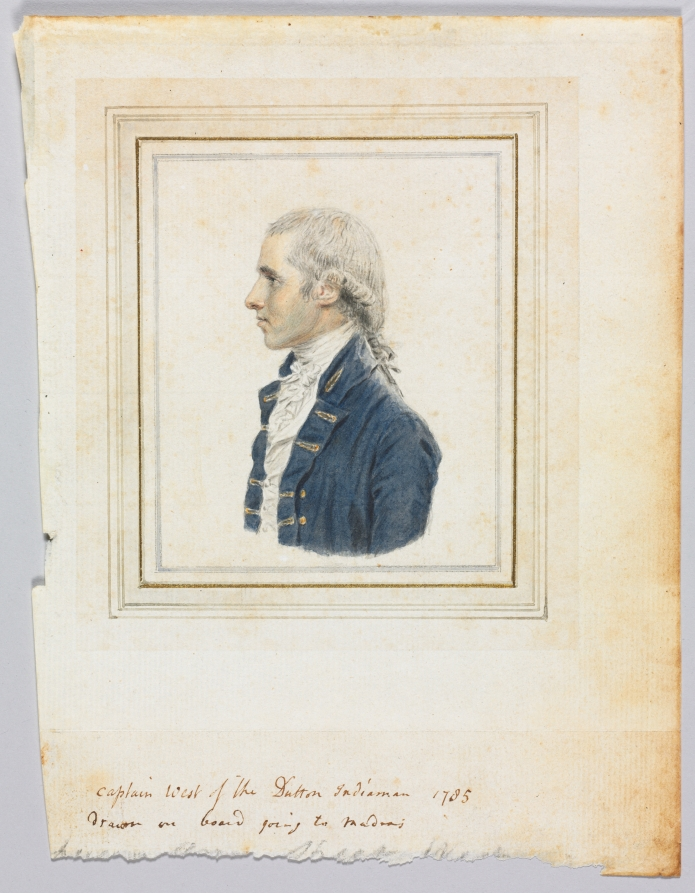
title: Portrait of Sir Captain West of the Dutton Indiaman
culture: England, 18th century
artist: John I Smart (British, 1741–1811)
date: 1785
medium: watercolor over traces of black chalk, with metallic gold paint on laid paper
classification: Portrait Miniature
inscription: by artist, across bottom, in brown ink: Captain West of the Dutton Indiaman 1785 / drawn on board going to Madras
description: Smart painted Captain West’s head in profile, turned to the right. His powdered hair is worn en queue with curls above his ears and white powder on his shoulders. He has long eyelashes, parted lips, and a grayish cast to his skin tone, particularly over his beard. West dons a blue coat with gold buttonholes embroidered in gold and a white waistcoat, high collar, and cravat tied in a small bow. This work is a finished drawing by Smart, evidenced in part by its larger size and by the fact that the painting of the sitter’s clothing is complete and the bust is placed within an elaborate border comprised of blue, metallic gold, and gray lines. This finished quality does not preclude the possibility that the drawing may also have functioned as a preparatory sketch for a miniature on ivory, which has not been located. Captain James West sailed the Dutton Indiaman from England to Madras, India, on several occasions, including Smart’s voyage in 1785. At least one of the sons of British judge Sir Elijah Impey was traveling with Smart on his journey to India and had his portrait taken by the artist. Another of Impey’s sons wrote of an earlier return passage to England made with Captain West in 1784, shedding light on the sea captain’s character and disposition. Impey’s account conveys not only West’s personality but the atmosphere that prevailed on the ship over which the captain presided and on which Smart traveled and worked. As indicated by an inscription in the artist’s hand, this portrait was painted by Smart while he was aboard the Dutton en route to Madras and probably retained by the artist as a memento. In addition to the portrait of “Master Impey,” Smart is known to have taken the likeness of other figures while aboard the Dutton, including the quartermaster “Baker” and a French ship called the Consalateur, which was intercepted by the Dutton while sailing to India. The current location of both works is unknown.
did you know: In 1784 it was written that "Captain James West, had the just reputation of being a first-rate mariner, a well-informed, and thoroughly practical man of business, and in every way worthy of confidential intimacy."